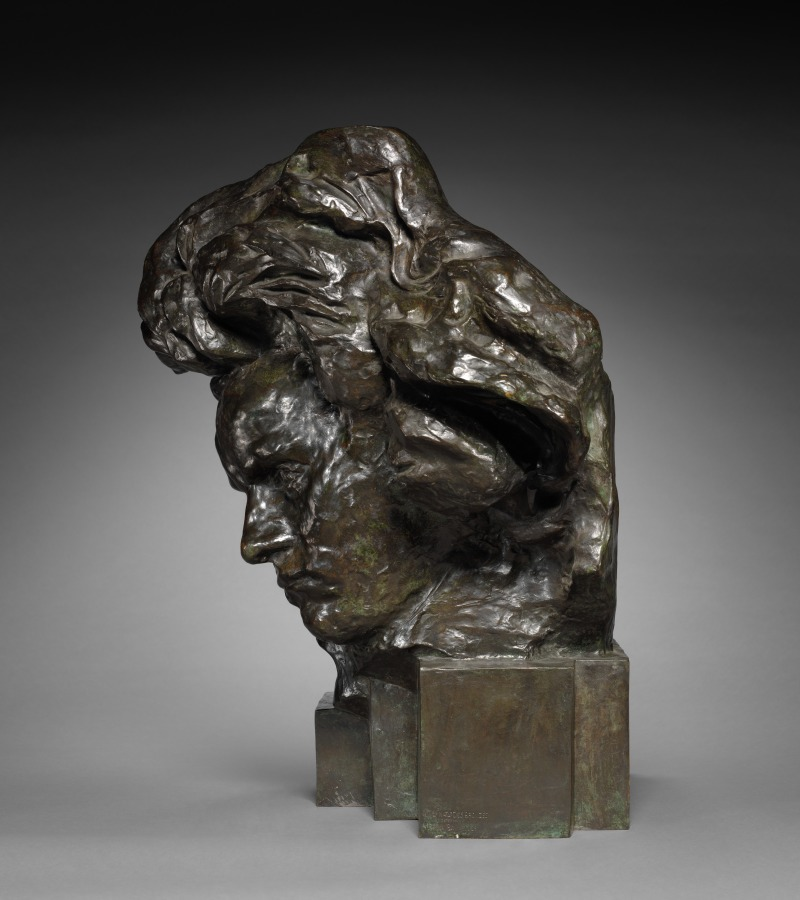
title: Head of Beethoven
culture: France, 19th century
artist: Emile Antoine Bourdelle (French, 1861–1929)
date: 1891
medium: bronze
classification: Sculpture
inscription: Signed left side: "Bourdelle / Sculpt."; inscribed right side: "FONRIENATLE DES BRONZES / J PETERMANN: ST GILLES BRUXELLES"; inscribed on front: "Mon domaine c'est l'air / quand le vent, se leve / mon âme tourbillonne / Beethoven"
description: A pioneer of modern sculpture, Antoine Bourdelle studied at the École des Beaux-Arts in Paris and worked as an assistant to Augustin Rodin, who greatly admired the younger artist’s work. In 1888 Bourdelle produced the first of a series of sculptural portraits of Ludwig van Beethoven, in which the artist orchestrated powerful billowing shapes to convey the creative spirit or genius of the composer. The artist inscribed a quote from Beethoven in the lower left: “My domain is the air; when the wind rises my soul swirls.”